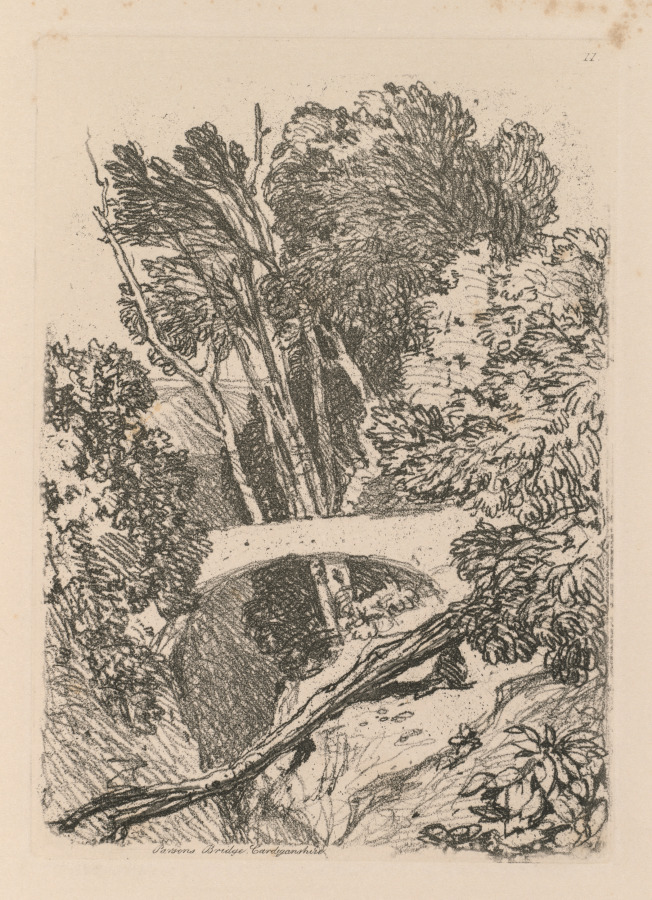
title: Liber Studiorum: Plate 11: Parson's Bridge, Cardingshire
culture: England, 19th century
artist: John Sell Cotman (British, 1782–1842)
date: 1838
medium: softground etching, from a bound volume containing 48 plates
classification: Bound Volume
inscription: In plate, within image, upper right: 11; in plate, below image: Parson's Bridge, Cardingshire